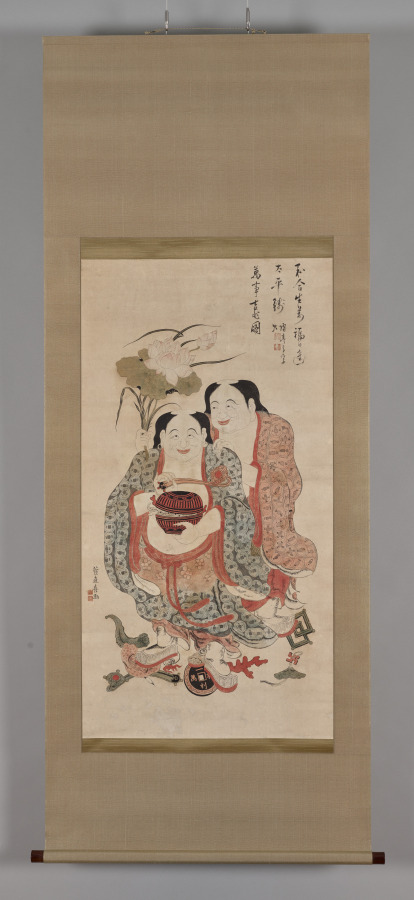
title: The Two Immortals of Harmony and Unity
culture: China, Qing dynasty (1644–1911), Qianlong reign (1736–95)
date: 1736–95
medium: Polychrome woodblock print; ink and color on paper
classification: Print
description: Woodblock printing in color reached a height in China in the 1600s to 1700s. The prints were executed by means of sets of separate blocks, each carved to print a different color.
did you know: In the 1600s, printing flourished in such Jiangnan cities as Nanjing, Suzhou, Hangzhou, and Huizhou, evolving from privately enjoyed illustrated books printed in color to more commercialized single-sheet color prints that were hung on walls and became part of the rich urban visual culture.